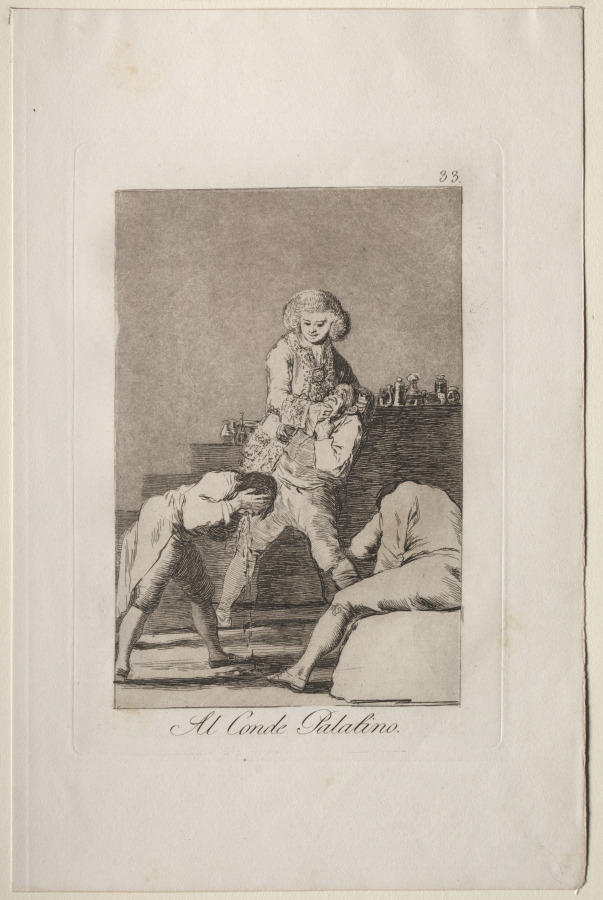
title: To the Count Palatine, Plate 33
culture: Spain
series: Los Caprichos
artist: Francisco de Goya (Spanish, 1746–1828)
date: 1799, printed c. 1855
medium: etching and aquatint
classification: Print